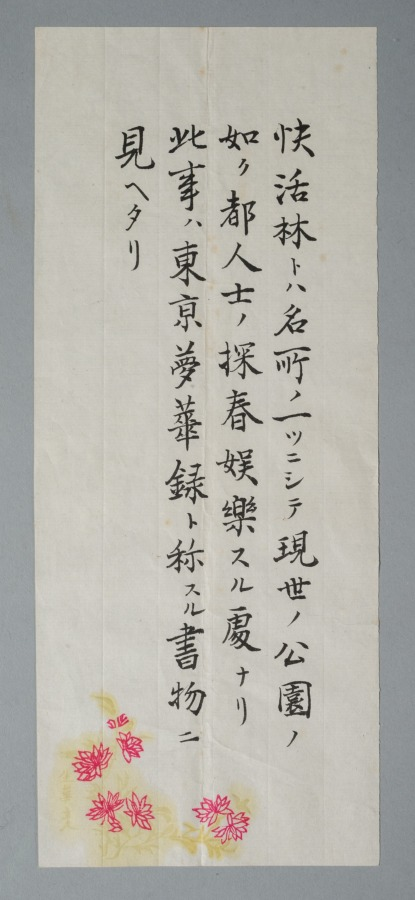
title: Happy Forest, from Water Margin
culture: Japan, Edo period (1615–1868)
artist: Matsumura Goshun (Japanese, 1752–1811)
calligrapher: and Amenomori Shōteki (Japanese, 1731–1786)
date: late 1700s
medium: hanging scroll; ink and color on paper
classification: Painting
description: The Chinese literary classic Water Margin is set in the 1120s and tells the story of 108 outlaws who first rebel against the government and then join forces with it. This painting depicts an episode in which hero Wu Song reclaims the tavern Happy Forest for its rightful owner, the prison warden’s son, Shi En. To prepare for the fight, Wu Song drinks a lot of wine. The painting was inscribed with a quote in which an ally describes Wu Song’s fighting style. It reads as follows: Where his twin fists rise, clouds and thunder roar, When his flying kick comes, wind and rain tremble.